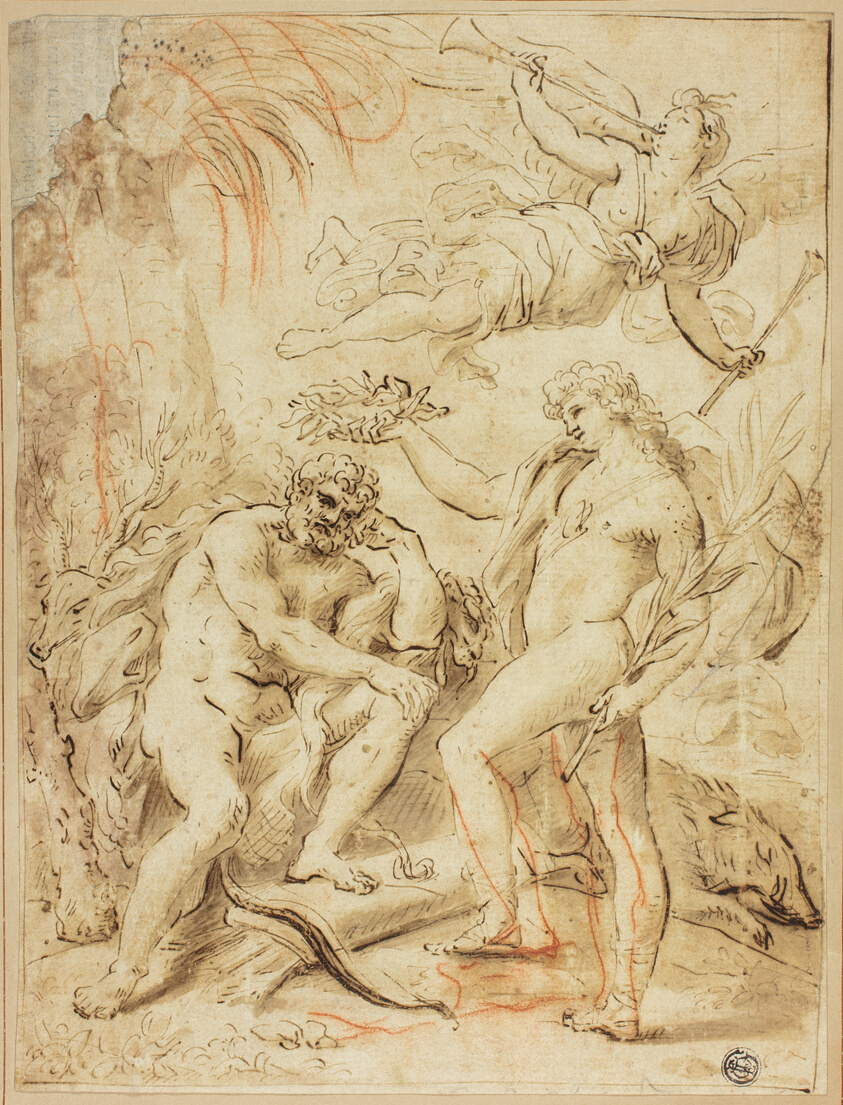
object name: Drawing and Watercolor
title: Crowning of Hercules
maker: Possibly Paolo de Matteis; Italian, 1662-c. 1728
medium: Pen and brown ink, with brush and brown wash and red chalk, on cream laid paper, tipped on tan wove card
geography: Italy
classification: pen and ink drawings; drawings (visual works); prints and drawing